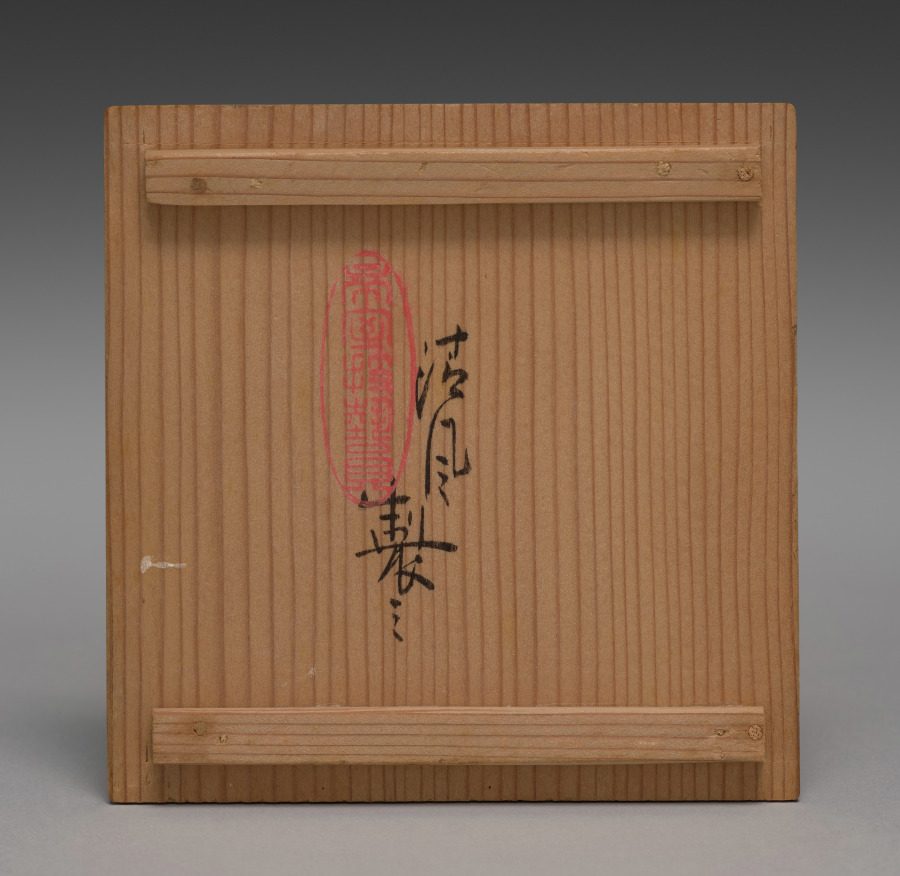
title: Teapot with Pines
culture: Japan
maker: Seifū Yohei III (Japanese, 1851–1914)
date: 1893–1914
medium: Porcelain with underglaze blue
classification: Ceramic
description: Side-handled teapots known as kyūsu and hot water coolers, or yuzamashi, are essential components of sencha tea sets. The teapot is, of course, meant for steeping and serving the tea. Yuzamashi are used to cool boiled water to the ideal temperature for the type of tea to be brewed. This teapot has a pine in underglaze blue on each side. The tip of one of these pines reaches onto the tiny lid, and as with the trees on the Water Cooler with Pines, CMA 2022.163, the trunks are curvy ribbons with little definition. Considering the execution of the two vessels' designs, one might imagine the pot and cooler to have been part of the same set.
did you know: This teapot with images of pines are among Seifū Yohei III’s designs painted in blue.